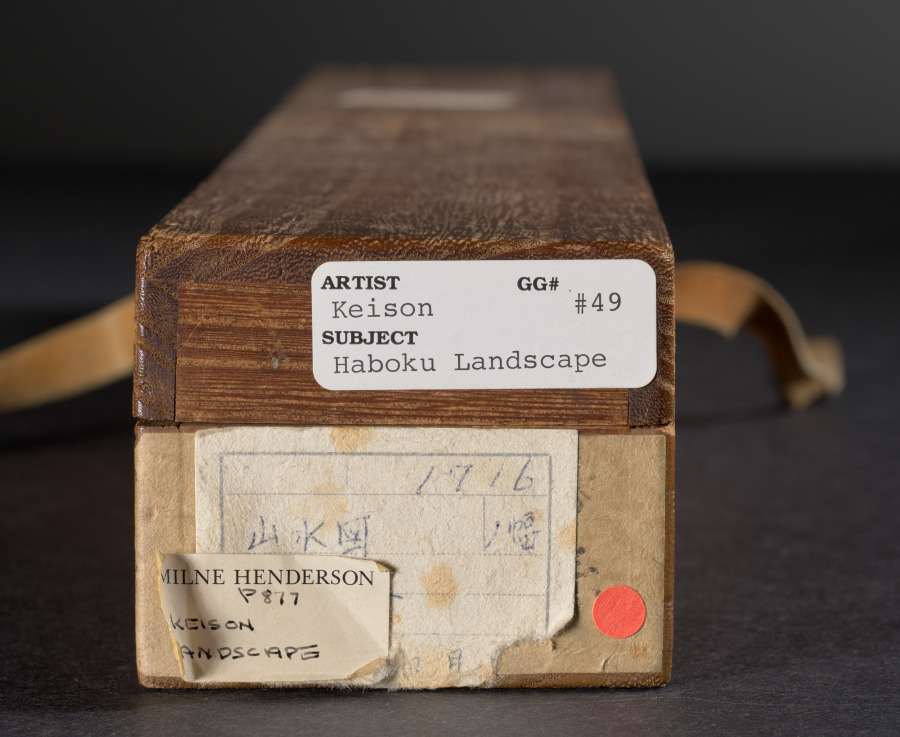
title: Coastal Landscape in the Haboku Style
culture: Japan, Muromachi period (1392–1573)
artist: Keison (Japanese, active late 15th to early 16th century)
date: late 1400s–early 1500s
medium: hanging scroll, ink on paper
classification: Painting